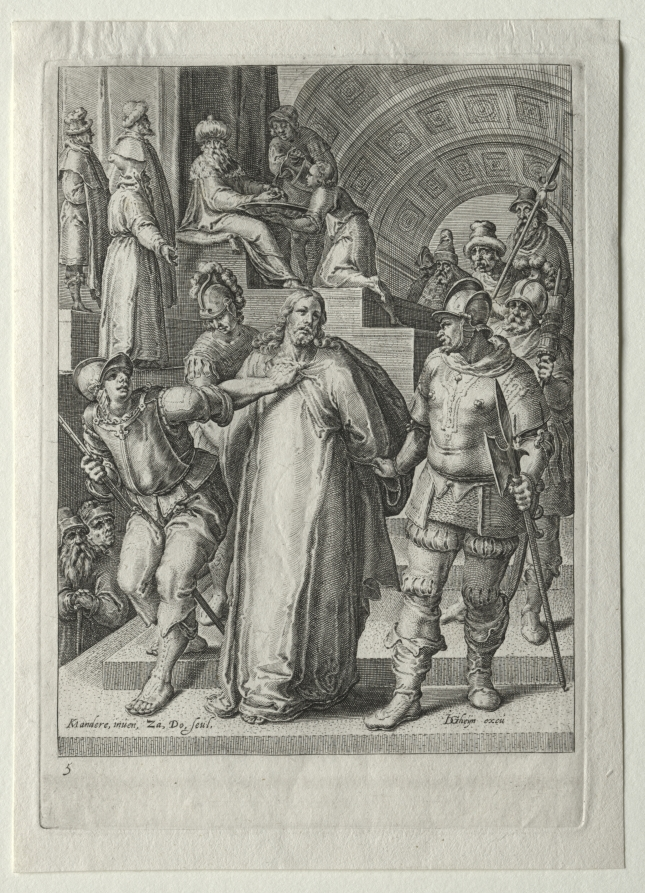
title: Passion Set: Christ before Pilate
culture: Netherlands, 16th century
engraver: Zacharias Dolendo (Dutch, 1561–1604)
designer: after Karel van Mander I (Dutch, 1548–1606)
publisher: Jacob de Gheyn II (Netherlandish, 1565–1629)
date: 1596–98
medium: engraving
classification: Print